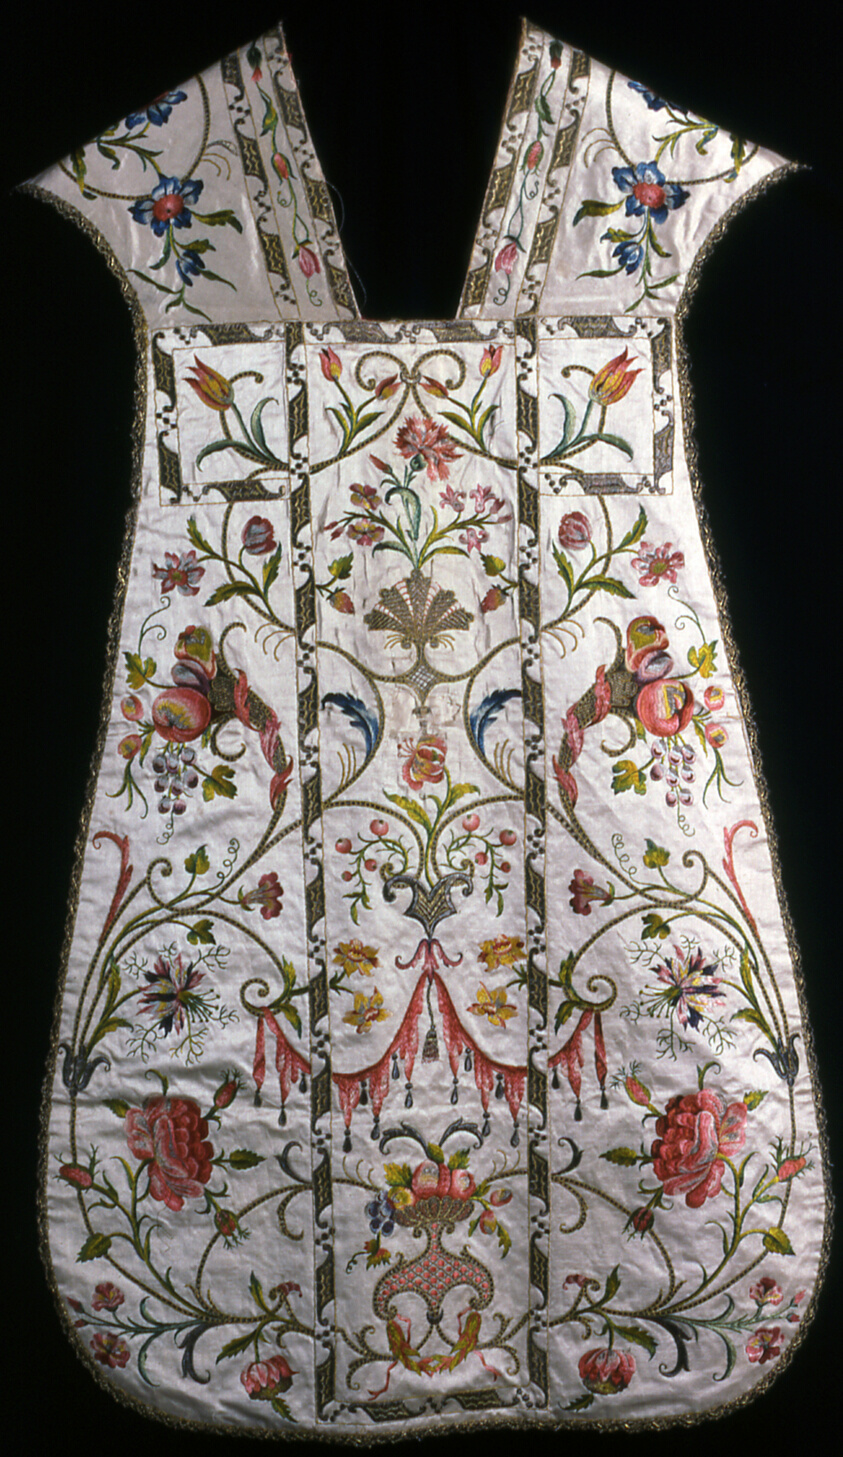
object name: Costume and Accessories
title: Chasuble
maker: Italy, Piemonte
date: 1740/50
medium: Silk, warp-float faced 7:1 satin weave; embroidered with silk and gilt- and silvered-metal-strip-wrapped silk in satin and split stitches; laid work, couching, and padded couching; lined with silk, plain weave; underlining with linen, plain weave; edged with gilt-metal-strip-wrapped silk, bobbin lace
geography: Italy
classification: textile; needlework (visual works); liturgical; lace - bobbin; costume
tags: flowers, garlands, swags